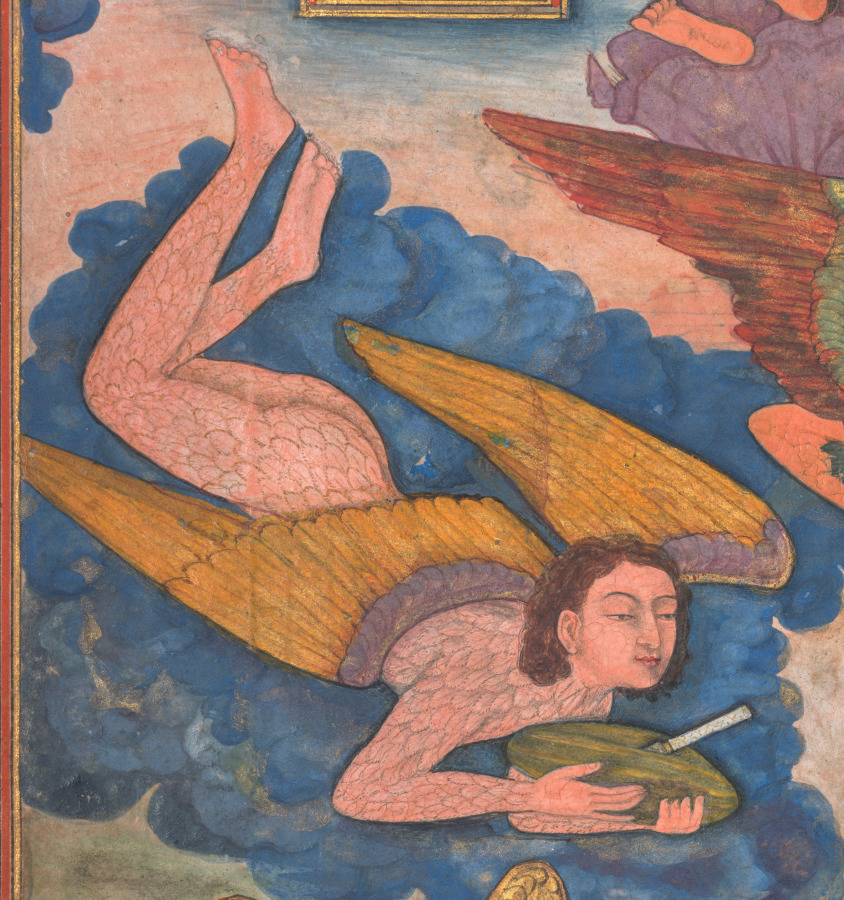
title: Angels bring food to Jesus in the wilderness (folio 55 recto), from a Mirror of Holiness (Mir’at al-quds) of Father Jerome Xavier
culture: Mughal India, Allahabad, made for Prince Salim (1569–1627)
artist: Muhammad Sharif (Indian, active c. 1600)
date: 1602–4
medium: Gum tempera, ink, color, and gold on paper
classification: Manuscript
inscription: Signature of the artist, Muhammad Sharif (Indian, active c. 1600), is written in the tiny pot by Jesus's foot.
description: To end his 40-day fast, five angels brought Jesus refreshments from heaven: breads, melons each with a knife for convenient cutting, fresh leeks, and what appear to be fragrant rice dishes and curries, along with cups of wine. Four of the angels are dressed in robes, and one is clothed only in feathers. After his baptism, Jesus spent 40 days and nights in the desert where he fasted, practiced spiritual exercises, and successfully resisted the temptations of Satan. Many of the rocks in this painting have faces, called grotesques. This page is the only surviving folio from this manuscript that has an artist’s signature, written in the tiny pot by Jesus’s foot.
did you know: The artist has put faces in the rocks, following a Persian convention.